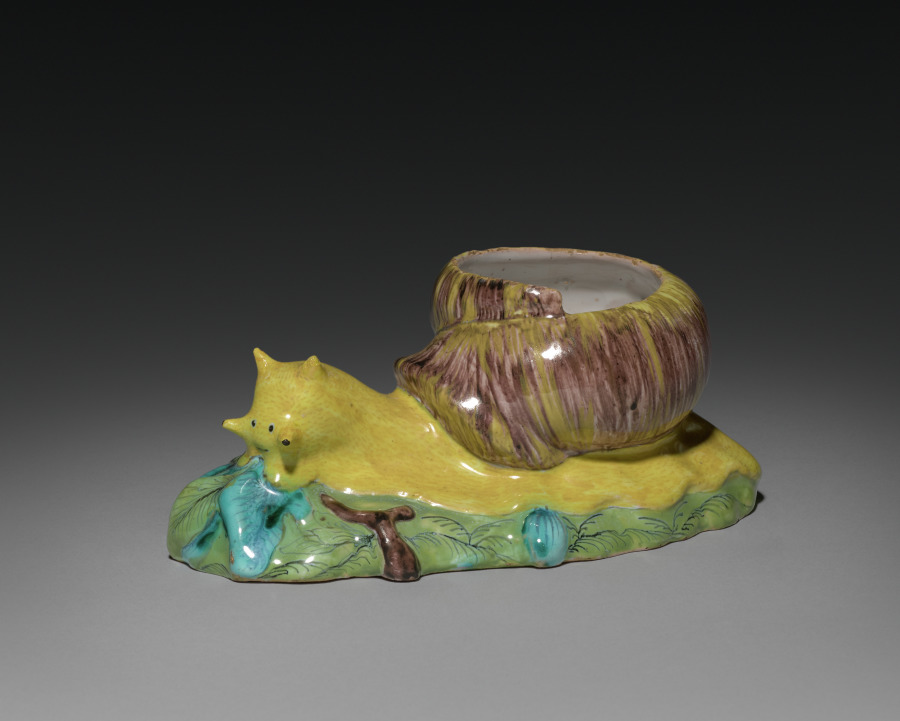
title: Box in the Form of a Snail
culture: France, 18th century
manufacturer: Strasbourg Factory (France)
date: c. 1750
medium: faience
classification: Ceramic